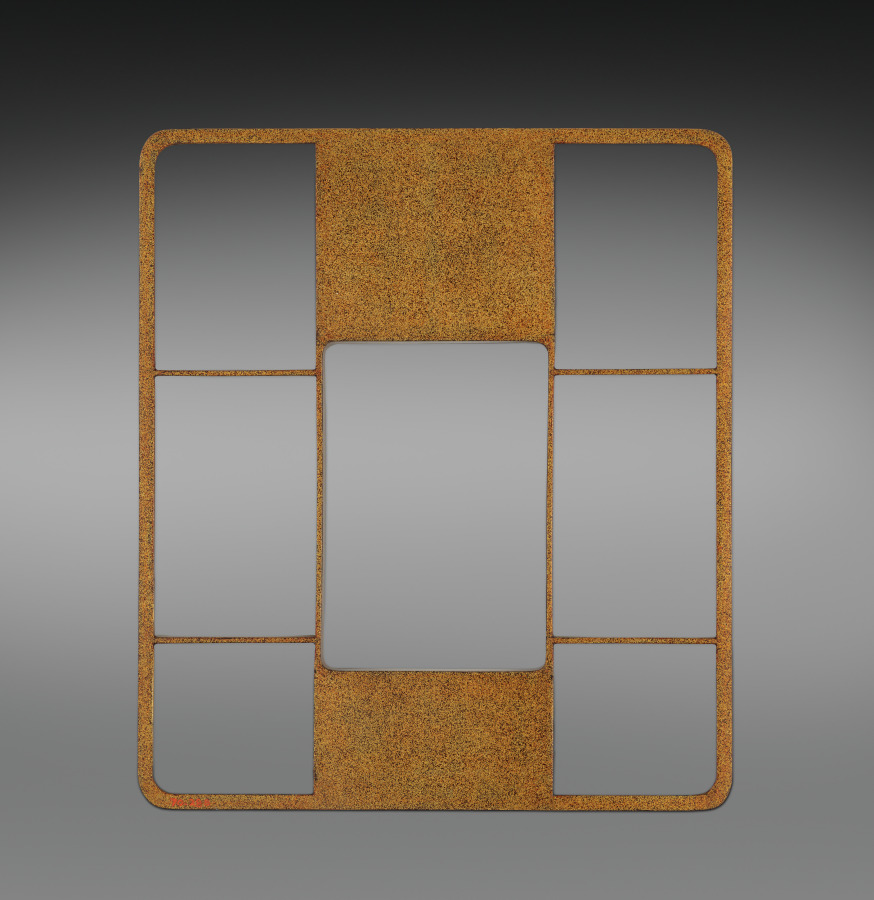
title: Writing Box (Suzuribako) with the “First Song” (Hatsune) Chapter from the Tale of Genji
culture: Japan, Meiji period (1868–1912)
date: early 1900s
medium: Lacquered wood with gold and silver sprinkled powder (maki-e), foil application (kirikane), and metal inlay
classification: Lacquer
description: The design of this box was inspired by an object in the 1639 lacquer wedding set of Chiyohime, the daughter of the shogun (ruler). Information about the set became available in the Meiji period, leading some lacquer artists to emulate its designs. This box features a scene from the chapter “First Song” (Hatsune) of the Tale of Genji, in which Prince Genji and his love Murasaki enjoy her garden. It incorporates the written characters for “first” (初, hatsu) and “sound” (音, ne), indicating the first song of the warbler in spring, associated with the new year—the water dropper for mixing the ink is in the shape of this bird.